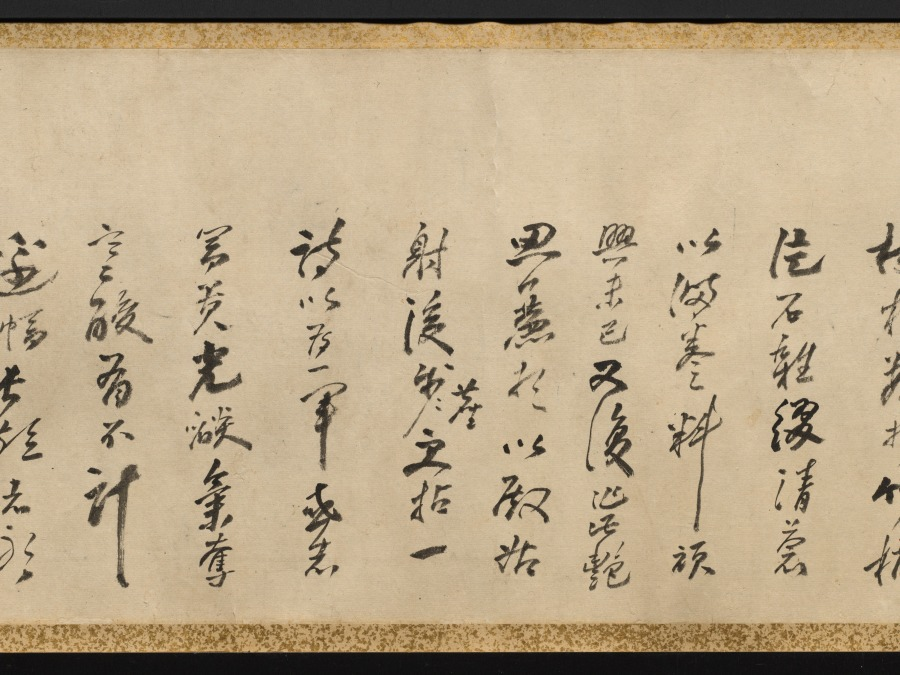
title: Plum Blossoms and Peonies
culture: China, Qing dynasty (1644-1911)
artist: Gao Fenghan (Chinese, 1683–1749)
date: 1741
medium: handscroll, ink on paper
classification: Painting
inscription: Artist's 2 inscriptions and 9 seals (the painting of Peonies with the artist's colophon and the colophon by Hou Chia-fan are on a single sheet of paper). Artist's inscription and 2 seals (Plum Blossoms): [seal] Ts'ai-yün. After finishing writing my colophon, I unrolled the painting to take another look, and it now seems that the composition here should have moved to the later part of the scroll. If that is the case, then the "Cool Beauty" [prunus] of the Solitary Hill is after all unable to take precedence over the "King of Flowers" [peony]. A laugh. Lao-fou inscribed. [seal] Feng-han. Artist's colophon (Plum Blossoms): [3 seals] Tun; Yen-yün-kung-yang, Hou-shang-tso-sheng. A few days after I painted this scroll for Shui- hsien [Yüeh Meng-yüan], the plum blossoms were in full bloom at his residence. He invited me over to enjoy them together for a long while, and I composed two additional poems and wrote them down here for his criticism. [Poems on the colophon are not translated.] First month, twenty-first day, your junior, Kao Feng-han of Nan-fou drafted this with the left hand. [seal] Feng-han. Artist's inscription and 4 seals (Peonies): Brushed with the left hand in the hsin-yu year [1741]. [seal] Yu-hsi. [3 seals at end of painting] Hou-shang-tso-sheng; Yen-yün-kung-yang; Shih-tsao-wu. Artist's colophon and seal (Peonies): The imperial concubine from the Yang family loved to dress in red, And from the emperor won the title of Hai-t'ang. But ever since she became the new dream of the moon palace, She changed into rainbow colors, while learning to dance. After I wrote the poem on Looking for Plum Blossoms in the Teng-wei Mountains, I attached to it a few branches of prunus, some bamboo tips and a piece of rock, with a scattering of green [moss] here and there to fill up the scroll. Unexpectedly, my playful fascination [with these subjects] was still not quite satisfied, so I made up these amorous ideas and romantic images [of the peony], to follow the footsteps of the fair lady of the Ku-hsieh Mountain [prunus]. Furthermore, I picked out one poem to be my vanguard. Perhaps such luminosity of wealth and power will be enough to overwhelm the poor fellows, and [they] will not mind the comparatively short length [of paper] assigned to it. Amusingly inscribed. Please correct me again. To Shui-hsien, my learned senior, your junior Han inscribed again. [seal] Tso-hua [left-handed painting]. 1 additional colophon and 5 additional seals: 1 colophon, dated 1742, and 3 seals of Hou Chia-fan (act. ca. 1742); 1 seal of P'u Ch'üan (20th c.?); 1 seal of Li family (dates unknown).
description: One of the so-called Yangzhou Eccentrics (a group of painters who lived in Yangzhou and were known for their unorthodox art and lifestyle), Gao Fenghan depicts China’s two most loved flowers in full bloom—the “cold beauty,” or plum blossom, in the first section, and the “king of flowers,” or peony, in the second section. Painted in 1741, the year when Gao decided to leave the south and return home to Shandong province in eastern China, this work was likely a token of farewell. His casual brushwork may indicate his mental and physical struggle at the time. After having crippled his right hand in 1737, Gao used his left hand to paint and achieved a crudeness and eccentric style unattainable before.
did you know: In East Asian art, peonies traditionally symbolize prosperity and wealth.